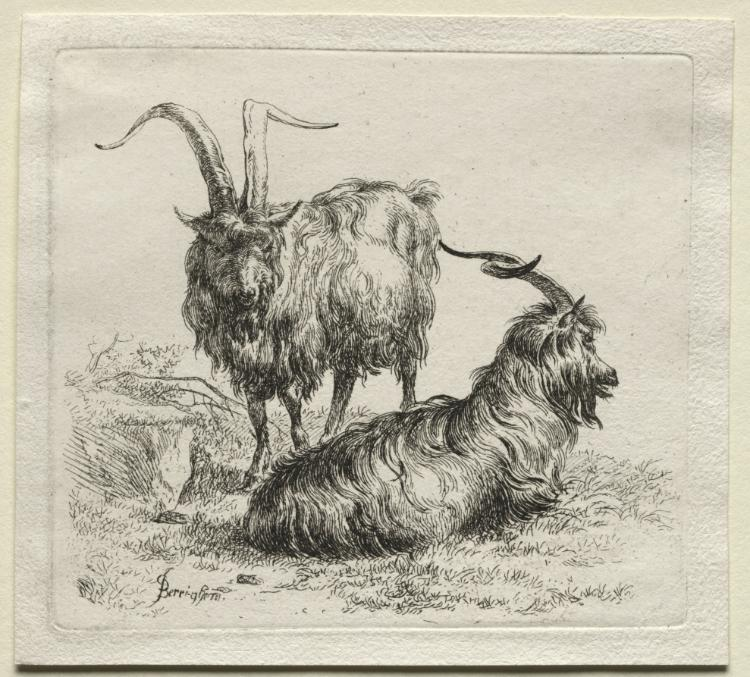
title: Animalia: Two Goats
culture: Netherlands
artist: Nicolaes Berchem (Dutch, 1620–1683)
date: 1635–83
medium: etching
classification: Print